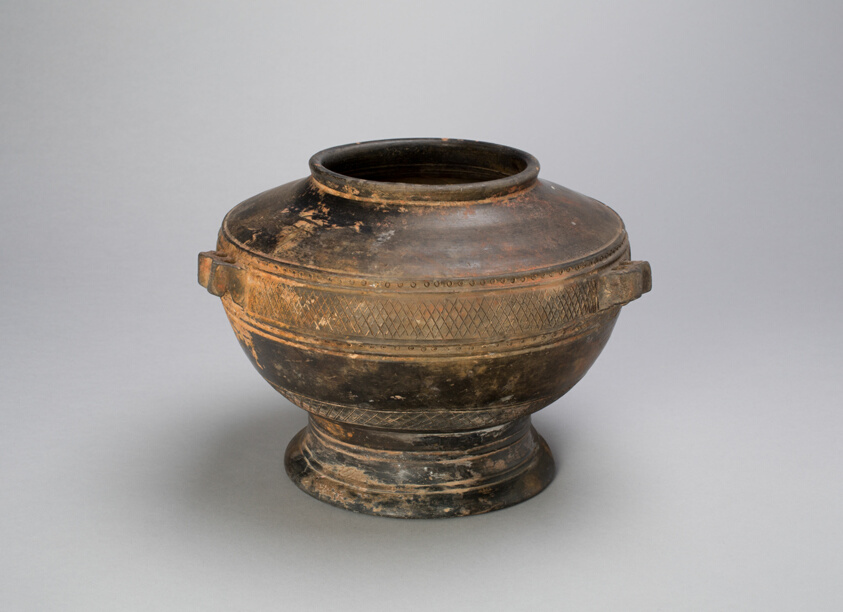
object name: Vessel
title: Footed Jar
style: Chinese (culture or style)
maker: China, possibly Henan province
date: Shang dynasty (c. 1600–1050 B.C.)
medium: Burnished gray earthenware with carved and incised decoration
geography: China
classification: ceramics; asian art; vessel